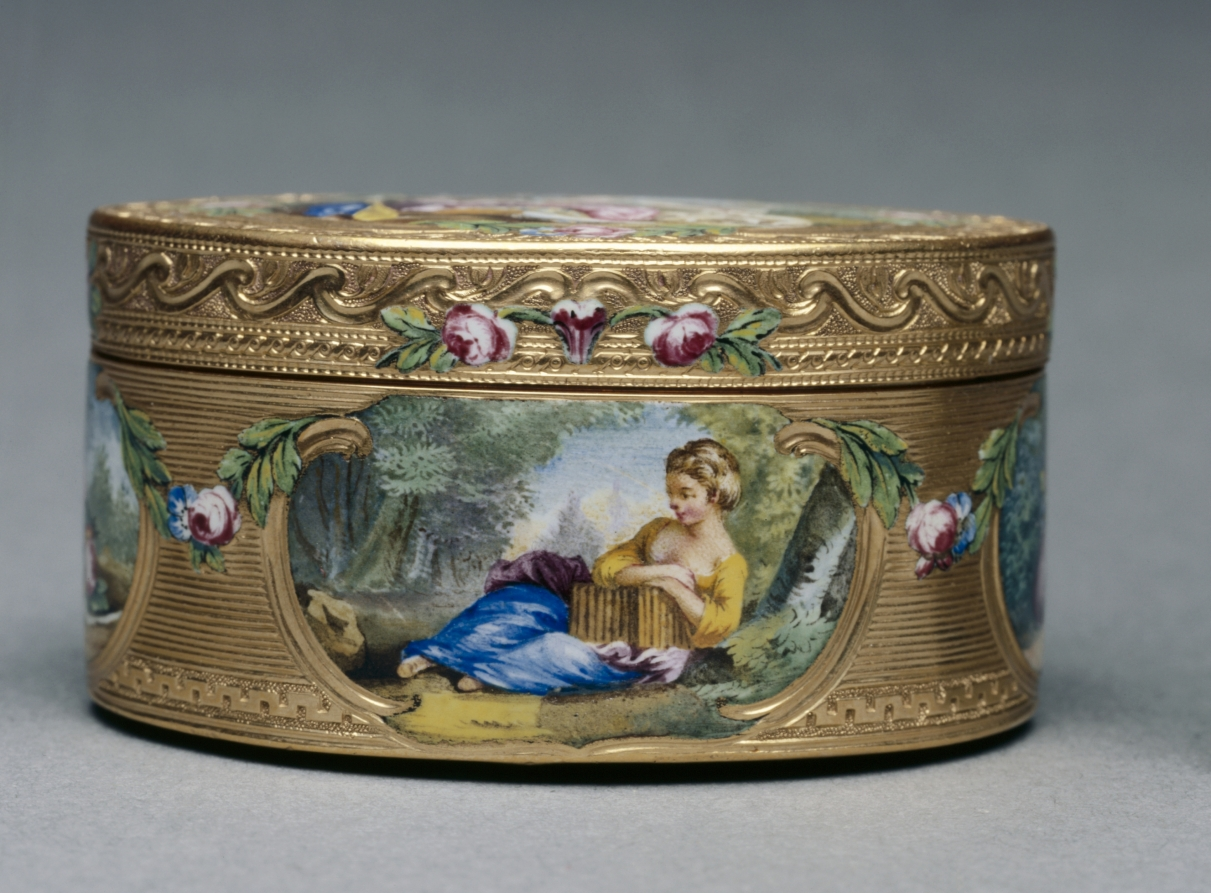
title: Snuff Box (Tabatière)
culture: France, 18th century (style of Louis XV)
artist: Francois Guillaume Tiron (French)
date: 1761–62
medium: gold and enamel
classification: Miscellaneous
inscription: [Maker's mark of Francois-Guillaume Tiron, master goldsmith in 1747, inside cover]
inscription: [Warden's mark, Paris, 1761-1762, inside cover]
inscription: [Charge mark of Eloi Brichard and Etienne Somfoye, Paris, 1756-1762, inside cover]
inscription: [Maker's mark of Francois-Guillaume Tiron, inside bottom]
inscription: [Warden's mark, 1761-1762, inside bottom]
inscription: [Charge mark of Brichard and Somfoye, inside bottom]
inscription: [Maker's mark of FG Tiron, left wall]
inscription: [Charge mark of Brichard and Somfoye, left wall]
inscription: [Warden's mark, Paris, 1761-1762, left wall]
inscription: [Discharge mark of J.J. Prevost, Paris, 1762-1768, bezel at right]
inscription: [Engraved number, maybe retailer's number]: "n. 13676"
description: The pastoral scenes that decorate this box are typical of the style of François Boucher, a celebrated painter of the period whose works were popularly reproduced on decorative arts. Snuff boxes, used practically as containers for powdered tobacco, were often decorated with miniature reproductions of notable works. The miniature on the cover is inspired by Boucher’s The Galant Pastor (Le Pasteur Gallant) (1738) and that on the bottom by The Amusement of the Shepherd Girl (L’Amusement de la Bergère) (1700s).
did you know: François Boucher was a favorite of the French royal court of Louis XV and named first painter of the king in 1765.